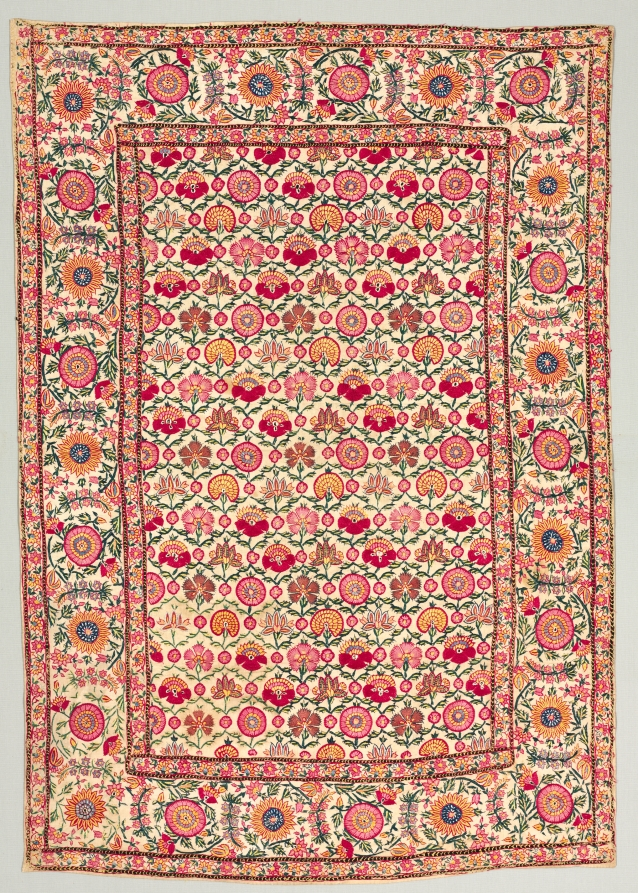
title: Embroidered Cover or Hanging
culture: India, Delhi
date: 1600s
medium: Silk on linen tabby ground; embroidery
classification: Embroidery